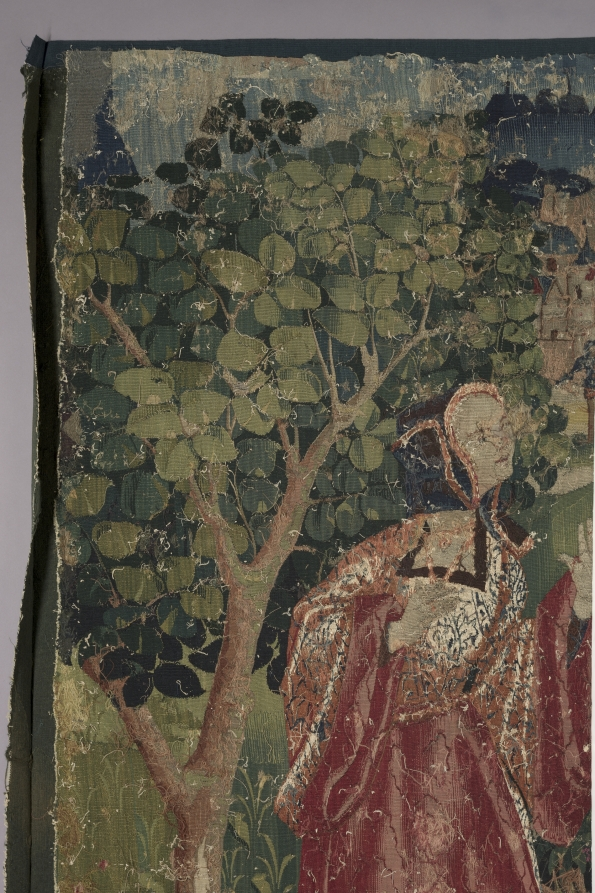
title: Youth (from Chateau de Chaumont set)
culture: France, Lyon(?), early 16th century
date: 1512–15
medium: silk and wool; tapestry weave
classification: Tapestry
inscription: French verse in Gothic letters translates as follows: Youth triumphs while its heart is healthy, And when it seems to hold all in its hand. But this triumph is without eternity. Here one sees the example full well: Those who are happy hide death in thier heart. Let the young heed this warning.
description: Louise of Savoy (1476-1531), queen mother of King Francis I, is depicted here in a sumptuous brocaded velvet in the center. She addresses youthful figures including Éléonore, Pierre Sala’s daughter who is facing her future husband, Hector. On the right, King Louis XII (died 1514) stands in front of the Chateau Langais where he had married Anne of Brittany. Above is Hector’s deceased father with a partially concealed skull under his robe, while a woman expresses surprise at the sight. The verse in Old French at the top states that youthful happiness is not eternal: Youth makes sounds as long as its heart is healthy, And thinks that it holds all in its hand. But this triumph is not eternal. Here you see clearly an example: He that is happy has death in his breast. Of this you people should take note.